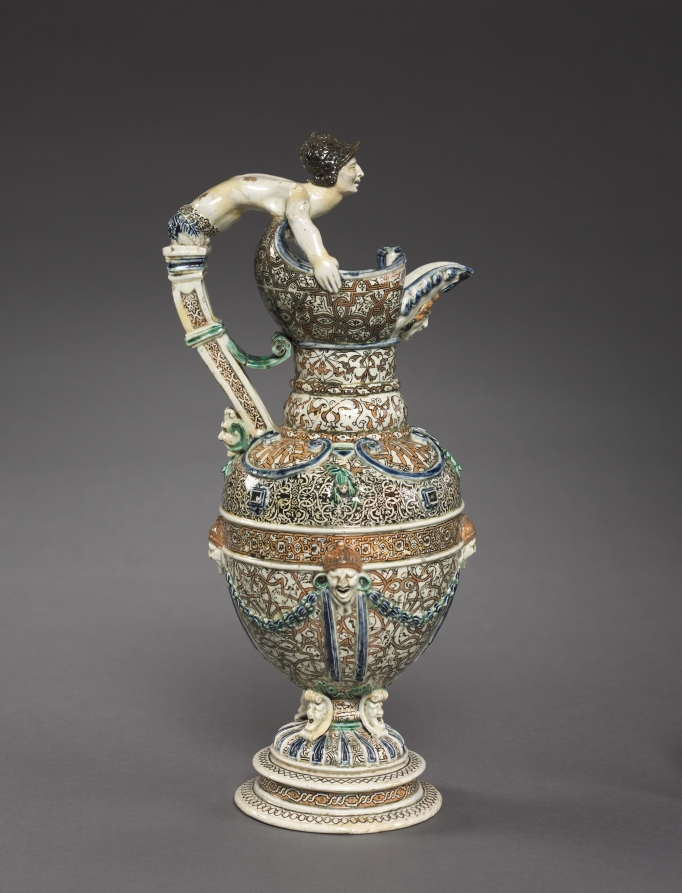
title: Ewer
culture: France, 16th century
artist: Saint-Porchaire (French)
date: c. 1540–67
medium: lead-glazed, white-paste earthenware with inlaid slip decoration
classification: Ceramic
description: An example of one of the most extravagant wares of this kind, this ewer is decorated with applied masks and frogs as well as a variety of stamped and inlaid designs. The shape and patterns reflect the metalwork of the time—the final period of this artistic pottery.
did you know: The green tree frog was one of the symbols of French King Henri II, indicating that this ewer may have either been made for the king or one of his courtiers.